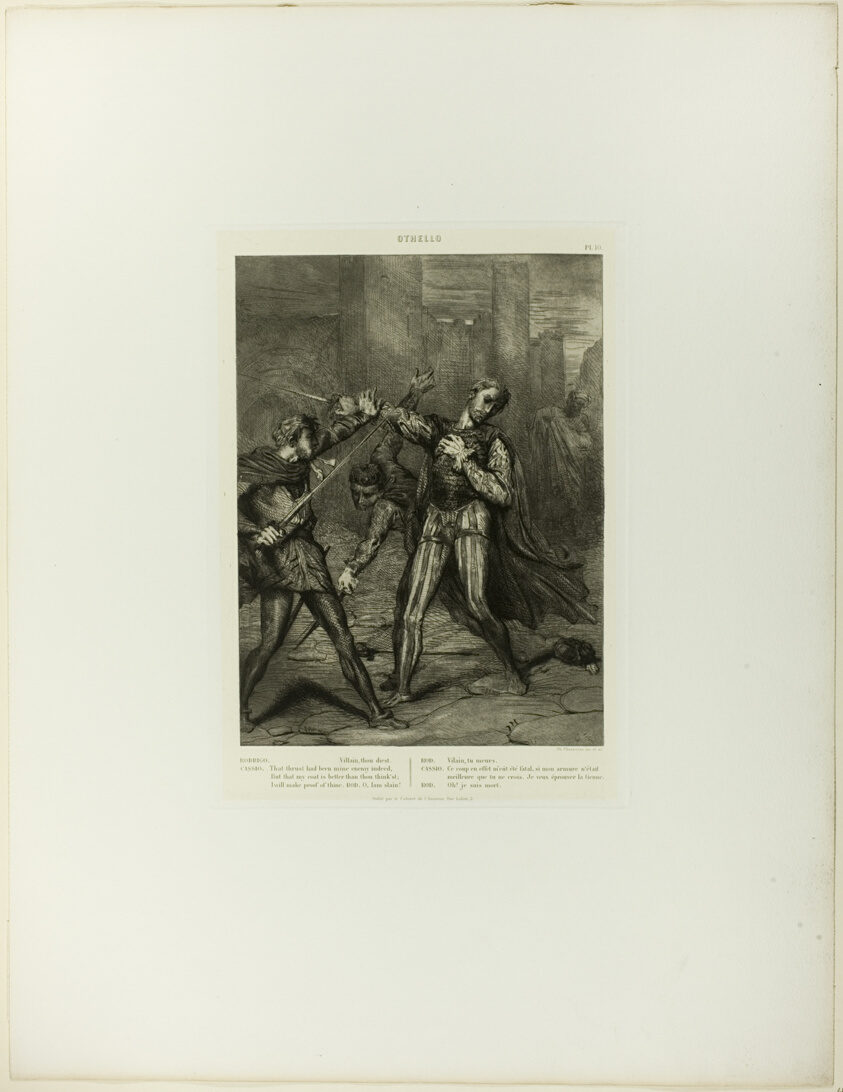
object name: Print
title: Villain, Thou Diest, plate ten from Othello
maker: Théodore Chassériau (French, 1819-1856)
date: 1844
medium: Etching, engraving and aquatint on ivory China paper, laid down on white wove paper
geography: France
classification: etching; print; prints and drawing